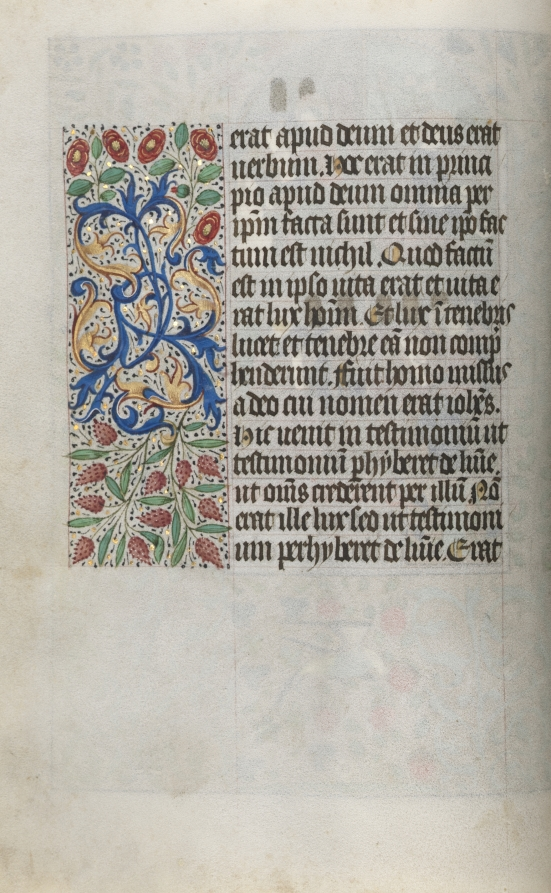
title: Book of Hours (Use of Rouen): fol. 13v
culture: France, Rouen, 15th century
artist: Master of the Geneva Latini (French, active Rouen, 1460–80)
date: c. 1470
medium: ink, tempera, and gold on vellum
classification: Bound Volume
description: In the late 1400s and early 1500s Rouen was an established and important center of book production. The city’s cathedral had a wealthy chapter that spent large sums of money to commission books and to maintain its extensive library. The stationers and booksellers would have likely been concentrated in or near the cathedral precinct. This artist, named after a manuscript now in Geneva, was Rouen’s principal illuminator during the second half of the 1400s.